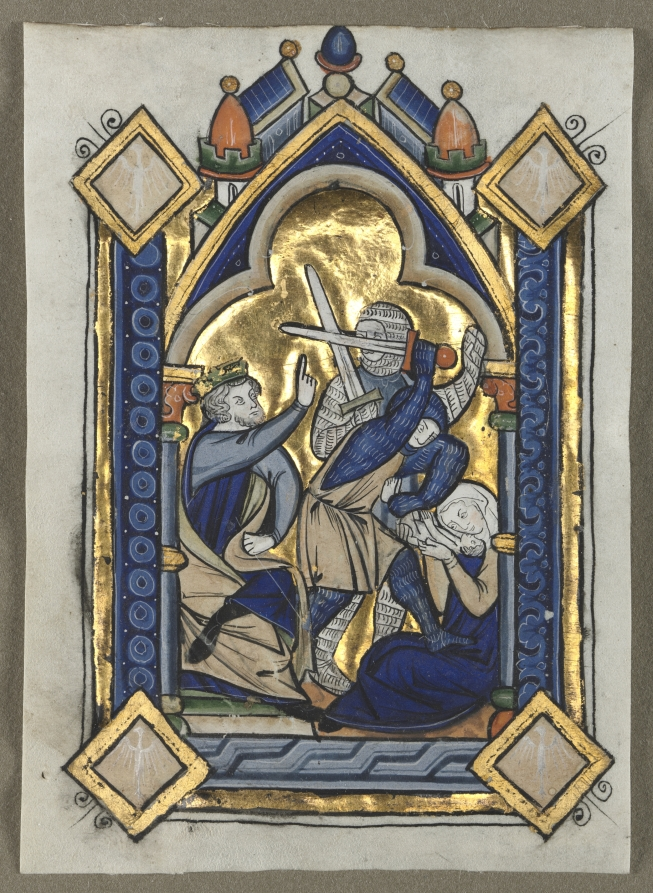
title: Leaf Excised from a Psalter: Massacre of the Innocents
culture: Flanders, Liège(?), 13th century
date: c. 1260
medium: tempera and burnished gold on vellum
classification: Manuscript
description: Traditional locations within manuscript psalters were designated by decorated initials or, as is the case here, full-page miniatures. These locations marked the major divisions of the psalms as used in the daily office. The extraordinary quality of these miniatures suggests they once decorated a deluxe psalter made for a wealthy or aristocratic patron, possibly a cleric.